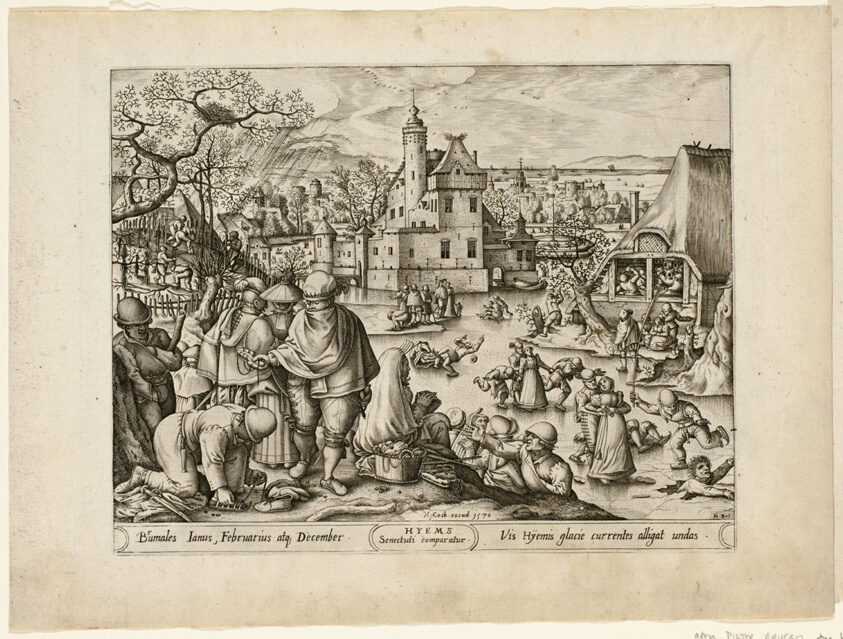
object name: Print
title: Winter, from The Four Seasons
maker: Pieter van der Heyden (Flemish, c. 1530–after 1584); after Hans Bol (Netherlandish, 1534–1593); published by Hieronymus Cock (Flemish, c. 1510–1570)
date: 1570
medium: Engraving with etching in black on ivory laid paper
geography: Flanders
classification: engraving; paper; print; prints and drawing